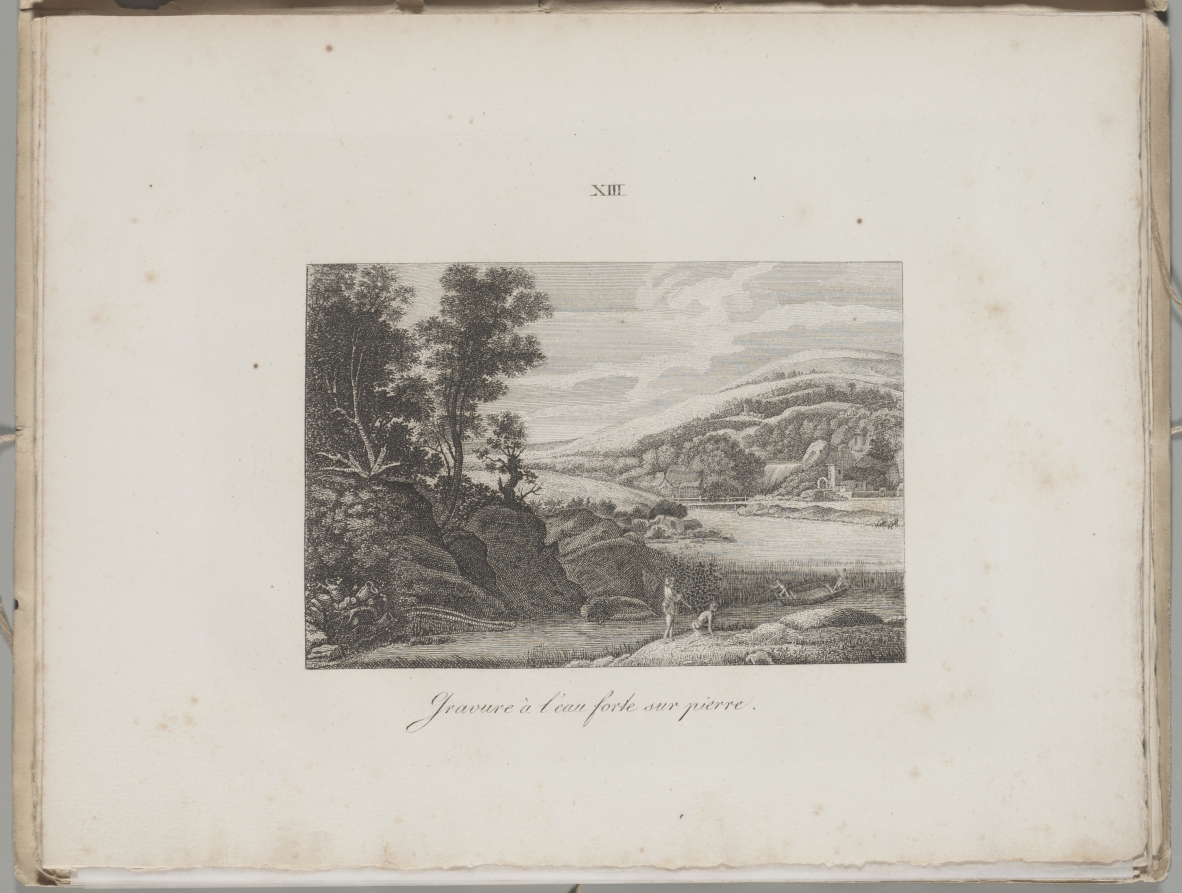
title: Art of the Lithograph: River Landscape, Plate XIII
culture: Germany, 19th century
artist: Alois Senefelder (German, 1771–1834)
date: 1819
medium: lithograph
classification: Portfolio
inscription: On plate: lower center: Gravure à l'eau forte sur pierre; upper center: XIII